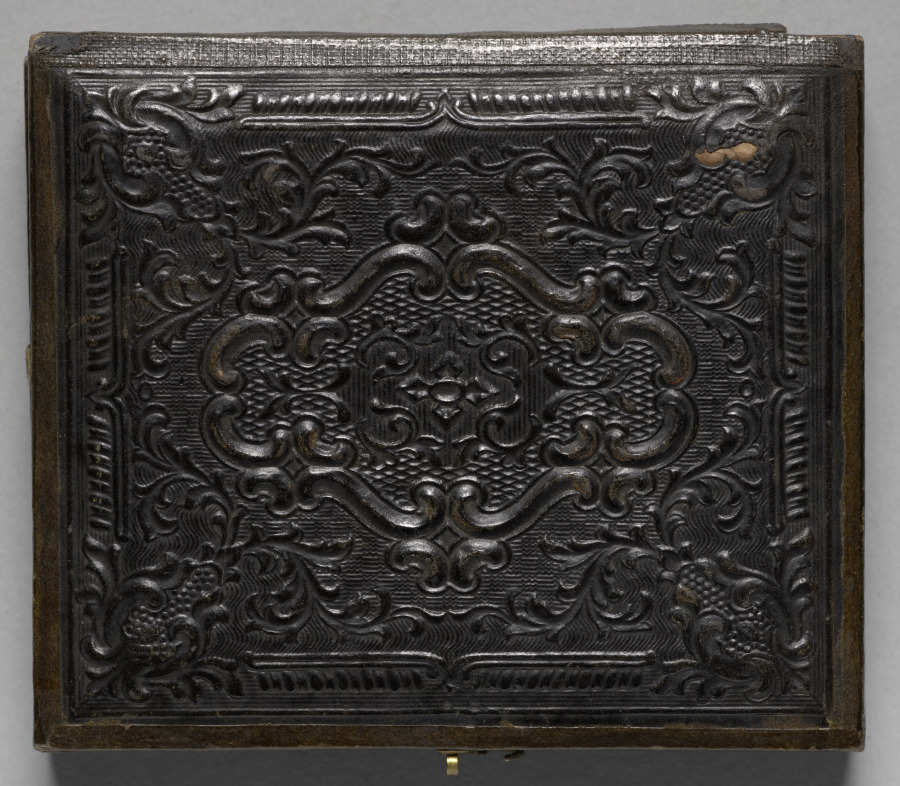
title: High Rock Tower and Stone Cottage, Lynn, Massachusetts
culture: America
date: c. 1862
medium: ambrotype, sixth plate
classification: Photograph